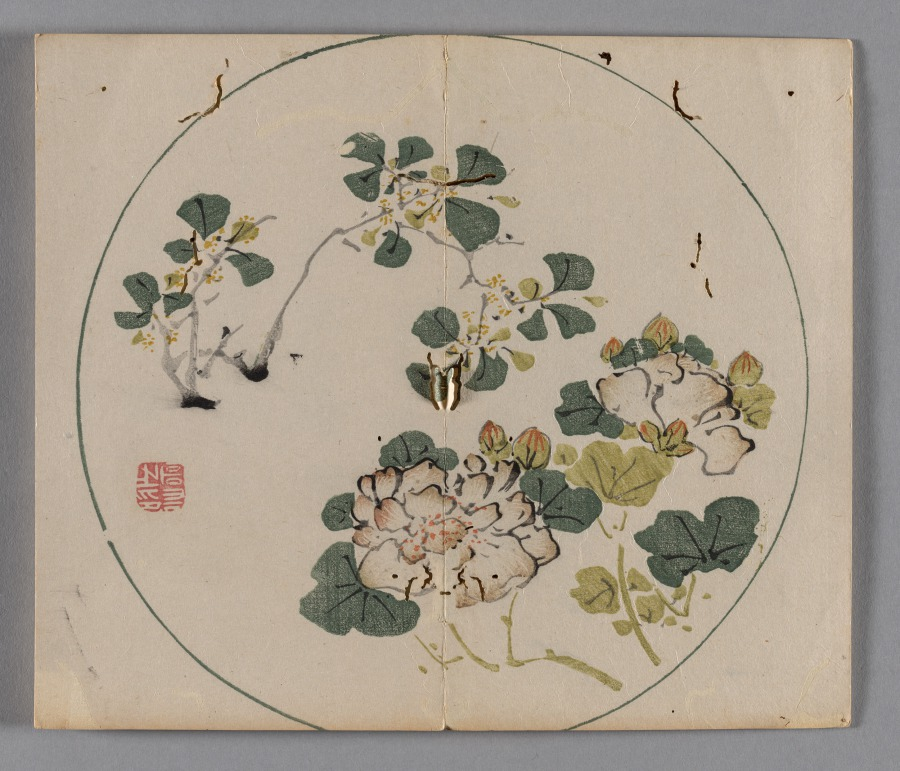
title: Ten Bamboo Studio Painting and Calligraphy Handbook (Shizhuzhai shuhua pu): Round Fans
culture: China, Qing dynasty (1644-1911)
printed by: Hu Zhengyan (Chinese, c. 1584–1674)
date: 1633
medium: Woodblock-printed book; ink and colors on paper; first edition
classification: Print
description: Color printing reached a level of perfection in the early 1600s, as seen in this Ten Bamboo Studio Collection of Calligraphy and Painting and the Mustard Seed Garden Manual of Painting (printed 1679 and 1701). The painterly quality, precision in registering (aligning) the woodblocks, and harmonious colors made them the most successful color print editions in Chinese history. Both editions were printed and compiled in Nanjing, spread nationwide, and had a great impact on the arts in Japan and Korea.